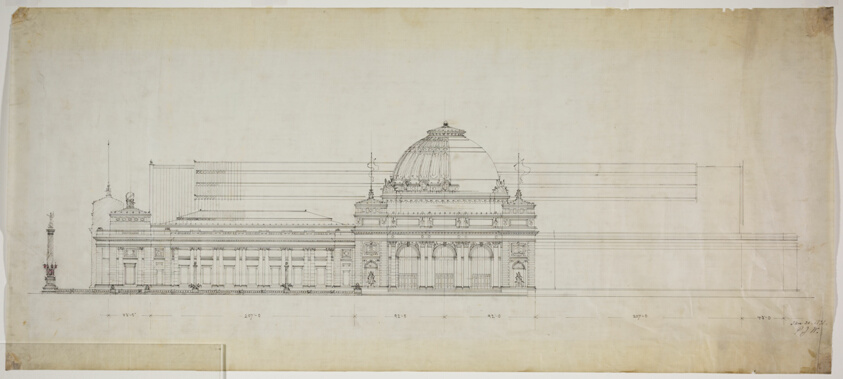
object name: Architectural Drawing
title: Lakefront Exhibition Hall, Chicago, Illinois, Elevation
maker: Peter J. Weber; American, born Germany, 1863-1923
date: 1888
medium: Ink and colored ink on linen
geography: Chicago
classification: presentation drawing; architecture; architectural drawing